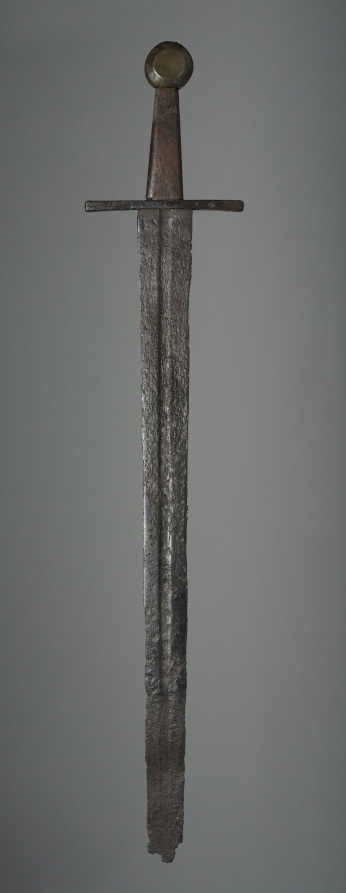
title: Sword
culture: Germany(?)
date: c. 1350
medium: iron; wood grip and brass pommel replacements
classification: Arms and Armor